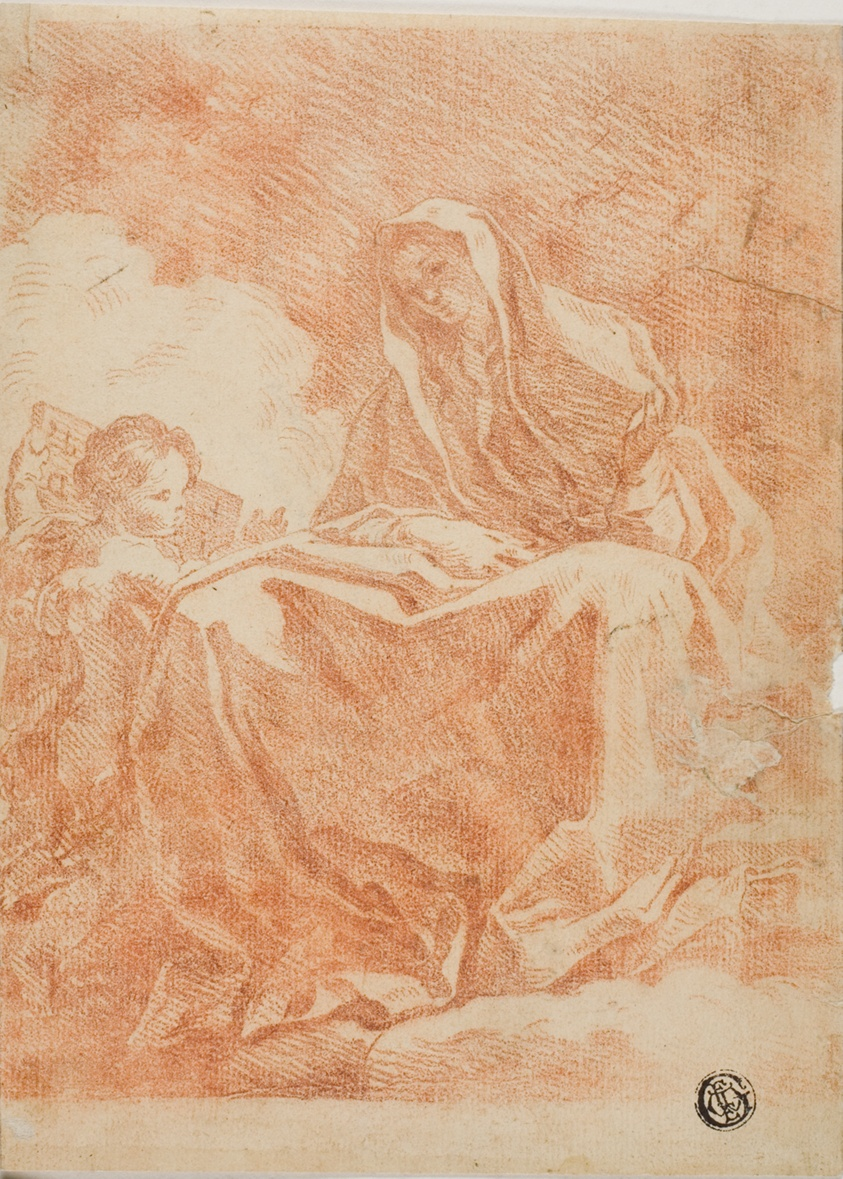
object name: Drawing and Watercolor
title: Mater Dolorosa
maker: Pierre Hubert Subleyras (French, 1699-1749)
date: 18th Century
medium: Red chalk on ivory laid paper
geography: France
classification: chalk; drawings (visual works); prints and drawing